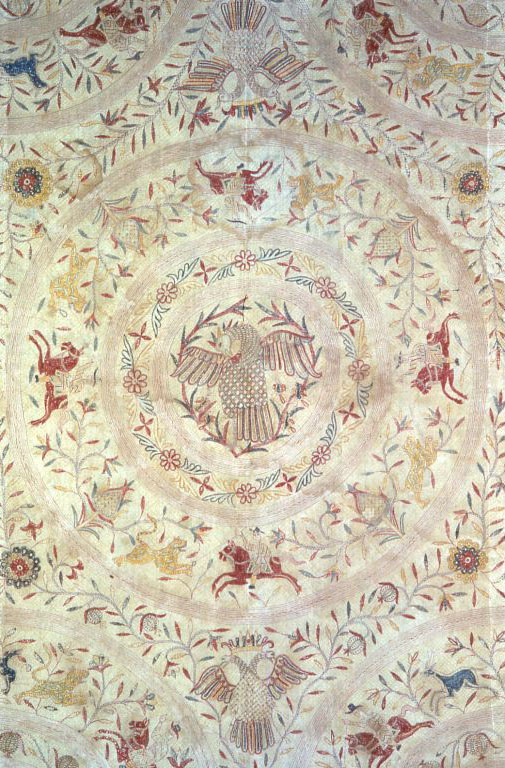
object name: Textile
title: Bedcover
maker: Indo-Portuguese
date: Late 17th century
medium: Four panels joined: cotton, plain weave; embroidered with silk floss in running, back, herringbone, long and short, chain, and filling stitches; interlining: cotton wadding; lining: five panels joined: cotton, plain weave; pieced; applied silk fringe; attached silk tassels at corners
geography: Portugal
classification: textile; weaving; needlework - quilt